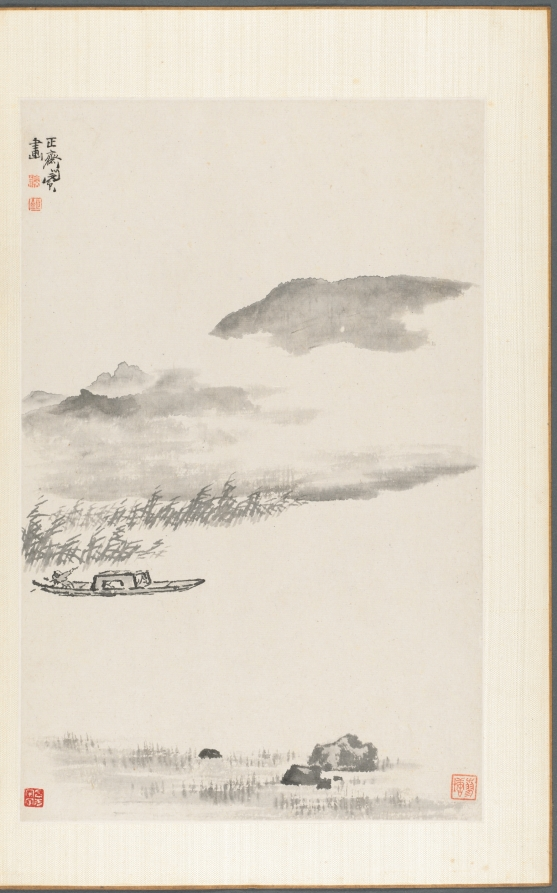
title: River Landscape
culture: China, Qing dynasty (1644-1911)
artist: Min Zhen (Chinese, 1730–after 1788)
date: 1788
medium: album leaf, ink on paper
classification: Painting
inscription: Inscription by Min Chen on the last leaf: I have a habit of collecting strange rocks. My friend Tai-li shan-jen* treasures my paintings as much as I treasure strange rocks. Once we agreed to exchange what we love with each other. However, my busy activities have kept me from carrying this out. This summer I realized that this strange rock has been sitting in my studio for five years, so I painted this to fulfill my old promise. As a record, I chose the grotesque cliff in the last scene of this twelve-leaf album. Cheng-chai, Min Chen inscribed this on the sixth day of the sixth month [July 9] of the wu-shen year [1788]. * Tai-li shan-jen is Wang Li [tzu: Li-fu] tr. Hou-mei Ishida Six seals appearing on the leaves: Min Chen, Cheng-chai, Ching-ch'iao, Chen, Liao-t'ang, Min Chen chih-yin.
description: Min Zhen, who was orphaned at age 12 and developed an eccentric personality, was trained by Tang Yin (1682–1756), a writer, playwright, and superintendent of the imperial porcelain workshops in Jingdezhen. The connection to him may have enabled Min to stay in Beijing for a decade from around 1773. It is not clear whether he ever resided in Yangzhou, but his style is in many instances reminiscent of that of Yangzhou artist Huang Shen. This album demonstrates Min’s versatility and mature style in the last years of his life.